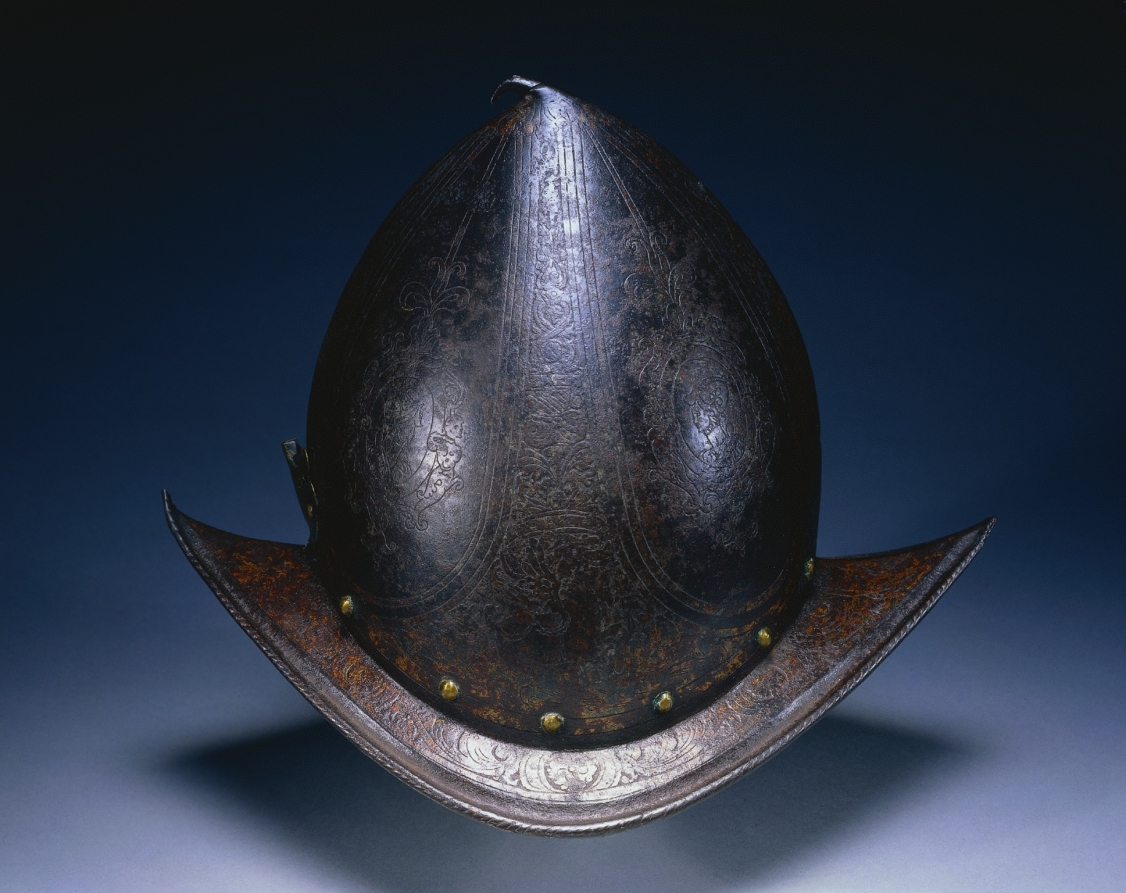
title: Peaked Morion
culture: North Italy, Milan?, 16th century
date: c. 1580–90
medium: etched russet steel with traces of gilding; roped brim, brass plume holder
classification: Arms and Armor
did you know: Originally this helmet was topped with a feathered plume. The Swiss Guard, a regiment of soldiers that has guarded the Vatican since the 16th century, wear similar looking peaked morions today, though theirs are adorned with voluminous ostrich feather plumes.